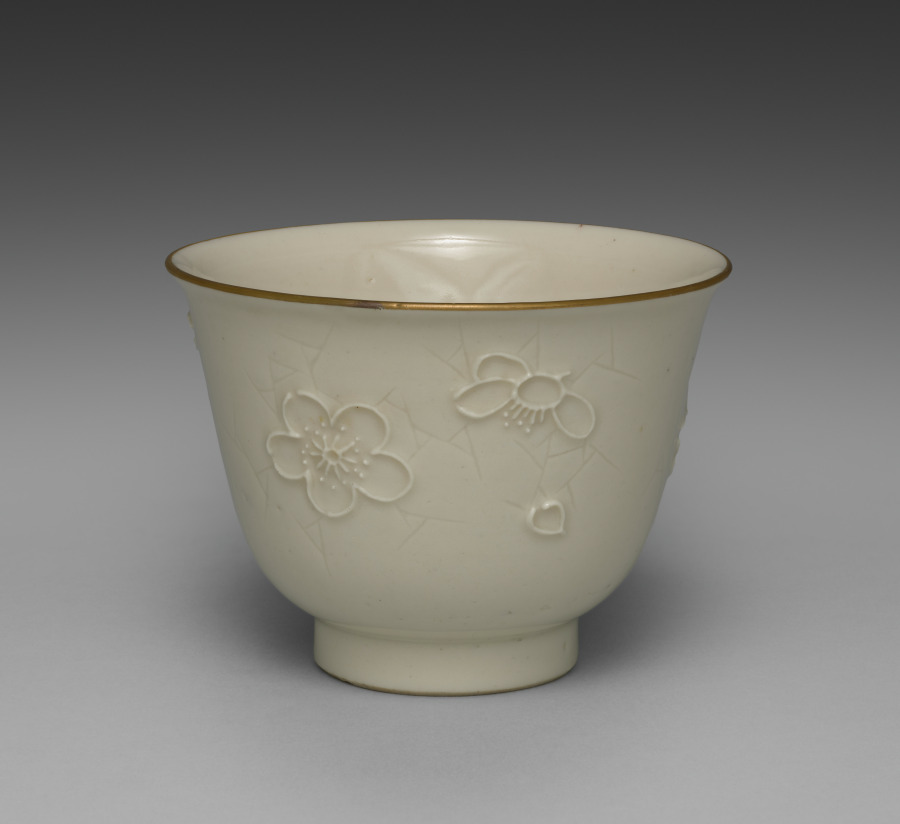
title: Drinking Cup from Dining Set with Plum Blossoms and Cracked-Ice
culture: Japan, Meiji period (1868–1912)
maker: Seifū Yohei II (Japanese, 1844–1878)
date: c. 1875–78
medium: Porcelain with molded designs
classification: Ceramic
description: Each item in this set has a delicate low-relief design of flowering plum branches over scattered, intersecting lines meant to resemble the cracked-ice surface of a frozen body of water and is signed on the base in gold pigment. While Yohei II produced many fine works in underglaze blue, like those produced by Kiyomizu Shichibei, he also made works in quite different styles later in his career, from the early 1870 s. In 1873, he was appointed purveyor to the Industrial Center of Kyoto Prefecture, a designation associated with Kyoto’s efforts to reach an international market through the port of Kobe; and from 1875 until his death, he was involved in national-level projects to present Japanese ceramics across the world. It was during this period that Yohei III was apprenticed to Yohei II, and it has been suggested that this set may in fact be an early example of Yohei III’s work, which he signed with his teacher’s name. Decorated with flowers resembling Japanese textile motifs, the set calls to mind the design of Yohei II’s pair of vases with plum blossoms in the Victoria and Albert Museum. Here, the elaborate trees created for a formal public exhibition setting have been translated into the approachable blossoms of the genteel domestic environment. While the designs are consistent across the pieces, each raised flower petal and pistil and each incised line in the ice was done by hand, so the cups, bowls, and dishes are similar yet unique. The bottoms of two boxes once identified the set’s owner, but the information has been deliberately obscured with black ink. However, inscriptions still visible appear to indicate two occasions, once at the end of July 1886 , and once again in June 1916 , when parts of the set were requested from Hokura in Niigata Prefecture. The location corresponds to a neighborhood in the present-day city of Jōetsu. The surname Tsuji 辻 also appears on a paper tag affixed to one of the box cloths. Future research may possibly reveal more about their provenance. A vase by Yohei III in a private collection combines the formal grandeur of the Yohei II vases in the Victoria and Albert Museum with the gentler design of this dining set, placing flowering plum trees against soft, scalloped-edge clouds resembling those in golden screens.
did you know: The dining wares have a creamy white coloration that the four boxes containing them identify as Korean in style.